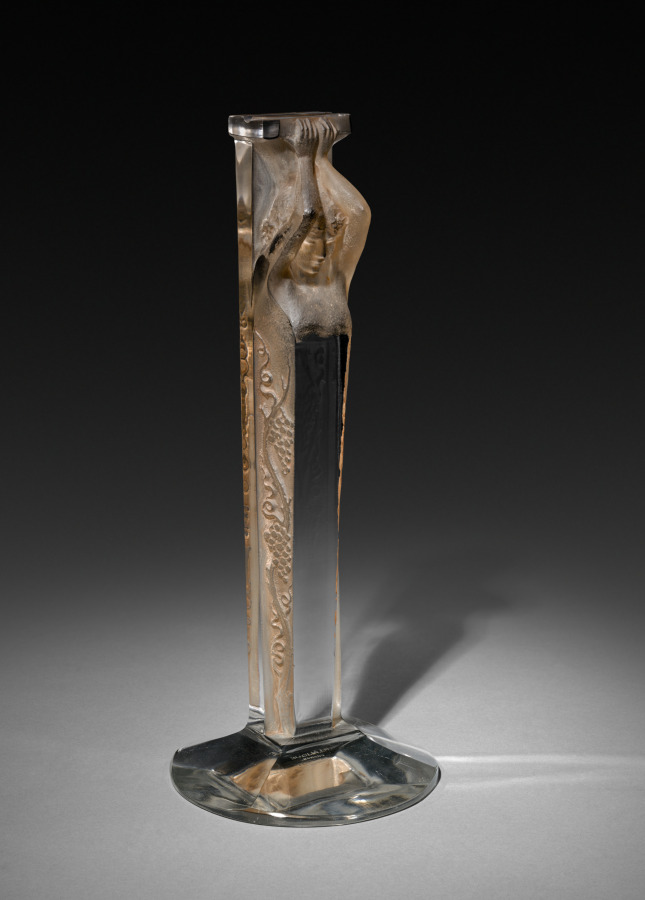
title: Bacchus Figural Centerpiece Support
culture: France, 20th century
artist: René Lalique (French, 1860–1945)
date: 1923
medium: Cast and patinated glass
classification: Glass